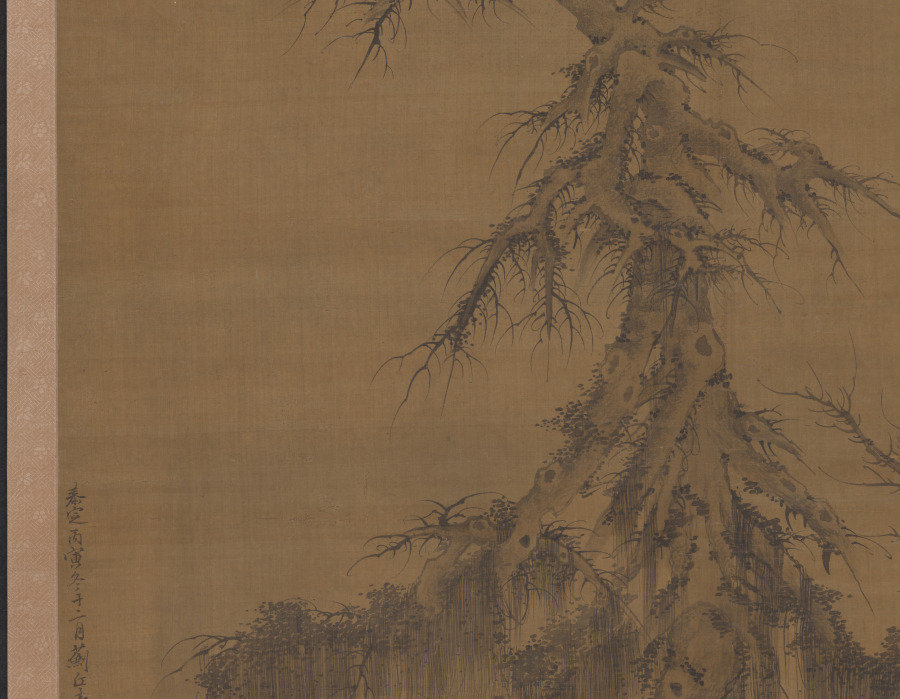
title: Old Trees by a Cool Spring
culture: China, Yuan dynasty (1271-1368)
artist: Li Shixing (Chinese, 1283–1328)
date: 1326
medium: hanging scroll; ink on silk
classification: Painting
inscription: 泰定丙寅年冬十二月薊丘李士行遵道作。[印] 李士行印; 李氏遵道; 遊戲翰墨.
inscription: 薊丘李侯能畫松，蟠根錯節騰蛟龍。 枯梢削鐵歲月古，細葉當風紫翠重。 昔人曾入子固夢，此株豈為秦官封。 畢宏韋偃偕已矣，請公放筆吾將從。 華溪九十翁沈夢麟書 蘊中上人題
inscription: [印] 明善堂所見書畫印記; [印] 怡親王寶